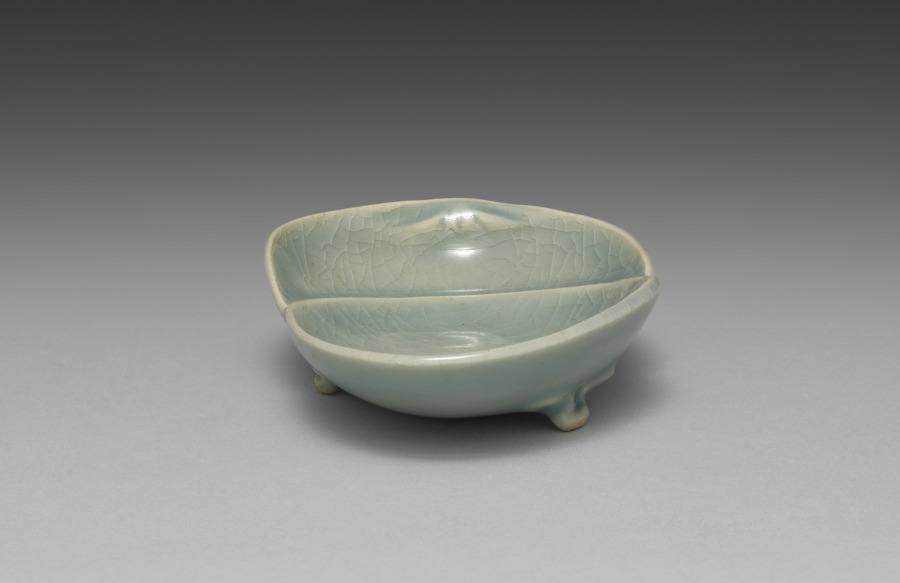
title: Dish from Saucers with Matching Shells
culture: Japan, Meiji period (1868–1912)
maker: Seifū Yohei III (Japanese, 1851–1914)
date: 1893–1914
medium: Porcelain with molded design and green crackled glaze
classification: Ceramic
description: Yohei III’s main output for his sophisticated clientele was in the form of tea sets and dining sets. He created a range of dishes in green glazes. He often produced in pairs, sets of five, or sets of ten. The set of five dishes with a more complex form is described as having a “water-colored glaze” (mizuiroyū). These are shaped like clam half shells, a reference to a game in which shell halves painted with narrative scenes or a variety of motifs must be matched back together by the players. The dishes have molded details to articulate the shell forms, and the crackling across each shell adds another dimension to the surface. Each dish is set on three small feet, formed by a pinched piece of clay and attached to an unglazed area on the underside of the dish. Curiously, while four of the dishes are stamped with the artist’s mark, one has instead a signature carved into the base.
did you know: The saucers are meant to look like matched halves of clam shells in reference to a once popular game.